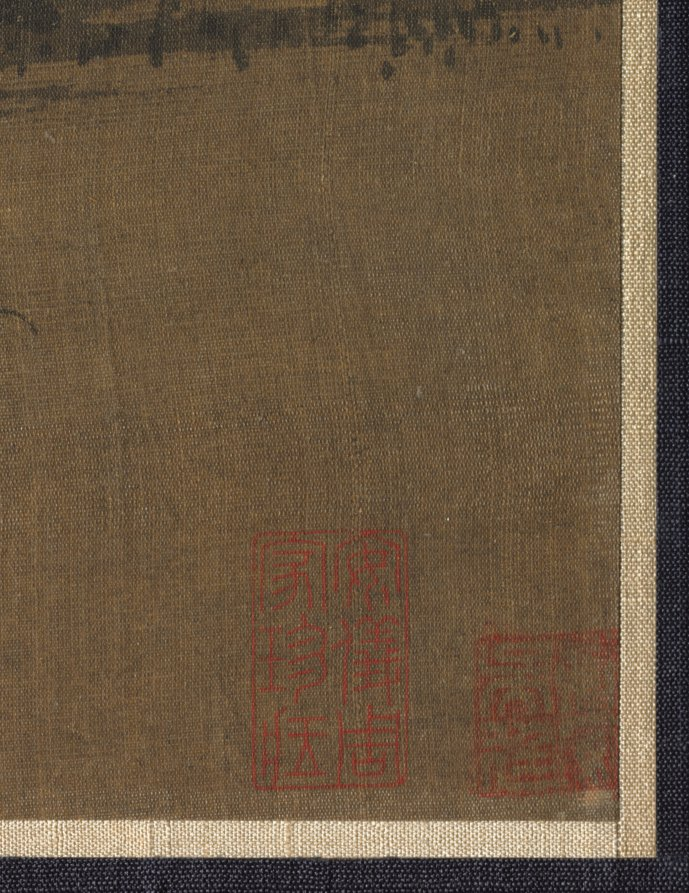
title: Buddhist Retreat by Stream and Mountains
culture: China, Northern Song dynasty (960-1127)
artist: Juran (Chinese, active 960–985)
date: 960–85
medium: Hanging scroll; ink on silk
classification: Painting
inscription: The upper portion of the scroll: the two small characters, “Ju wu 巨五”, written near the large seal. Written by a functionary in Shang Shu Sheng (the Department of State Affairs) when the painting was first received.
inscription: The upper portion of the scroll: the large seal, “Shang Shu Sheng yin 尚書省印” (seal of the Department of State Affairs)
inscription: The upper portion of the scroll: the half-seal “Si yin 司印”, seen along a border. Attributed to 典禮紀察司 of Ming dynasty.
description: Monk Juran served the Southern Tang (937–75) imperial house in Nanjing, where he studied with Dong Yuan (active 930s–60s). Both founded the southern landscape tradition, or Jiangnan school, known for gentle misty riverscapes in wet ink. Juran moved north to Kaifeng when the Southern Tang surrendered to the Northern Song, the impact of which may be seen in this painting, presumably painted after 976. A towering mountain dominates the composition, typically representing the style of the Northern Song academy; while the use of long hemp fiber strokes to texture the mountains, wet dots, and round boulders on mountain tops are elements of the southern landscape tradition.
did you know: This hanging scroll with the towering mountain is a prime example of the monumental landscape style of Northern Song.